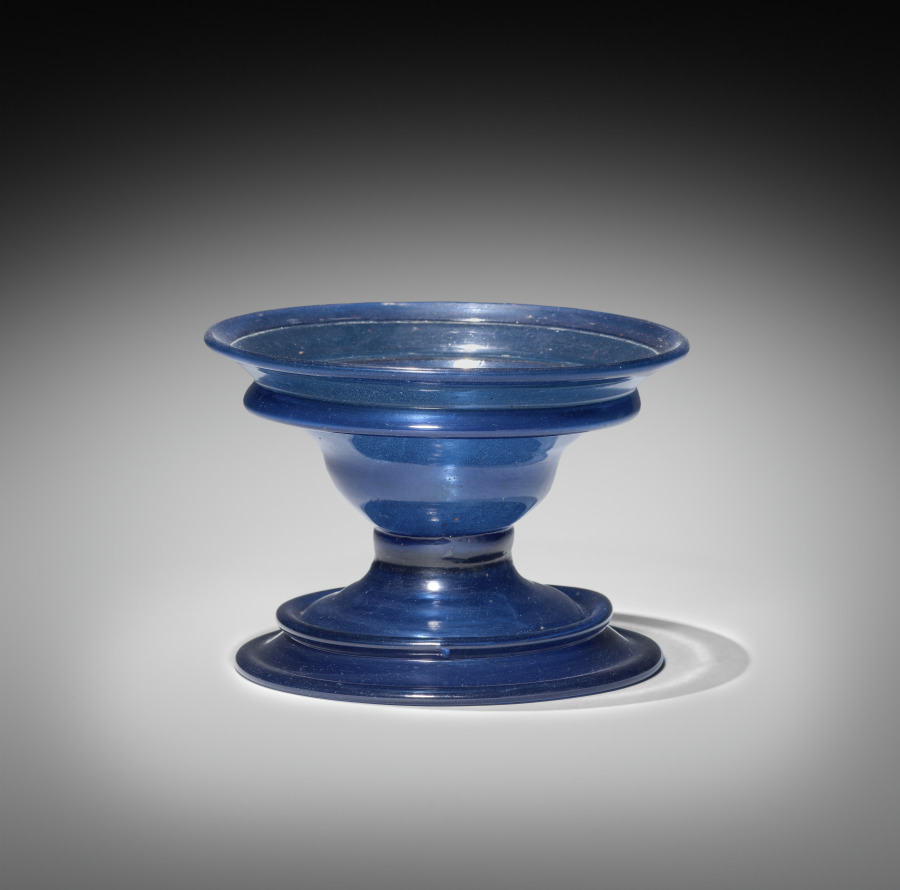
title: Bowl with Stand (stand)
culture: Syria, Roman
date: 100–400 CE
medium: glass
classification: Glass